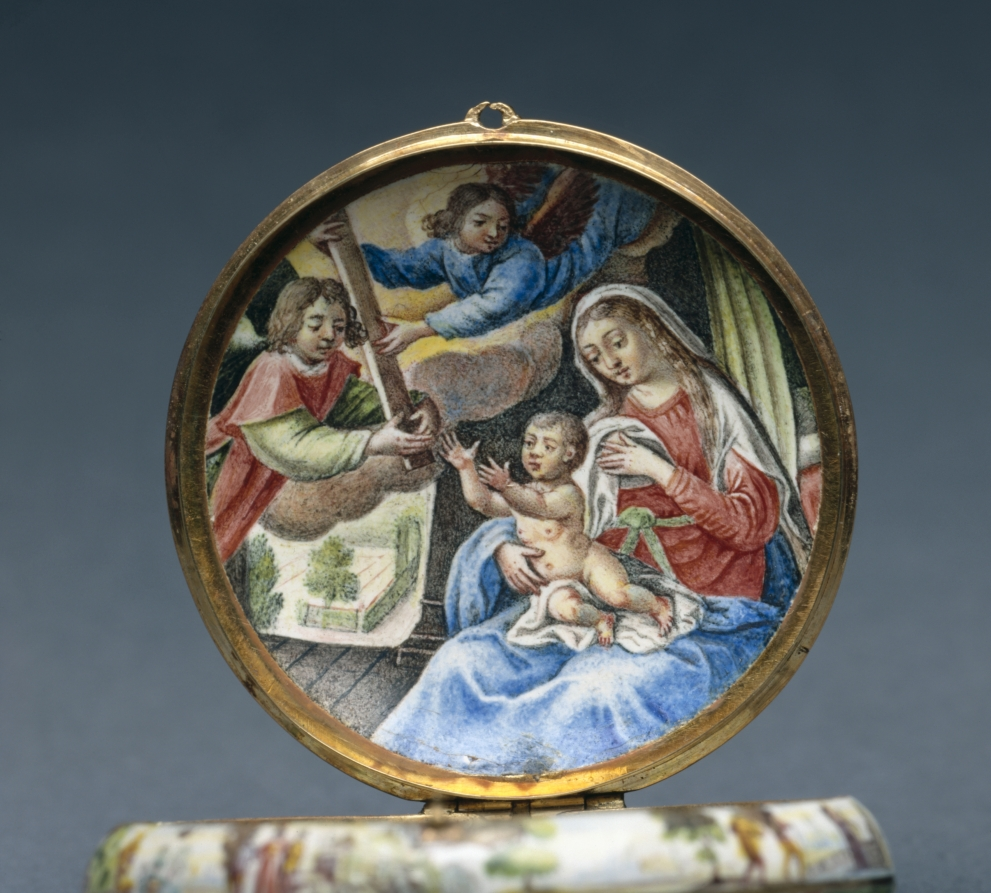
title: Watchcase (Boîtier de montre)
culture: France, 17th century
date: c. 1640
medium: gold and enamel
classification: Jewelry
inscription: [engraved on the rim]: "B8"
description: In the 1630s, the practice of painting with enamel on metal became a means for French miniature painters to achieve a more richly colored, durable product. Previously miniatures were painted with watercolor on vellum, a material made from animal skin. This case would have originally held a watch, but was later transformed into a simple box through the removal of the watch mechanism and ring. This watch case is richly painted inside and out with miniatures modeled after well-known religiously allegorical works.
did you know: Inspiration for the box’s miniatures was drawn from works by Peter Paul Rubens’ The Holy Family with Saints John the Baptist and Elizabeth (1615) (back panel) and Nicolas Cochin (interior base).